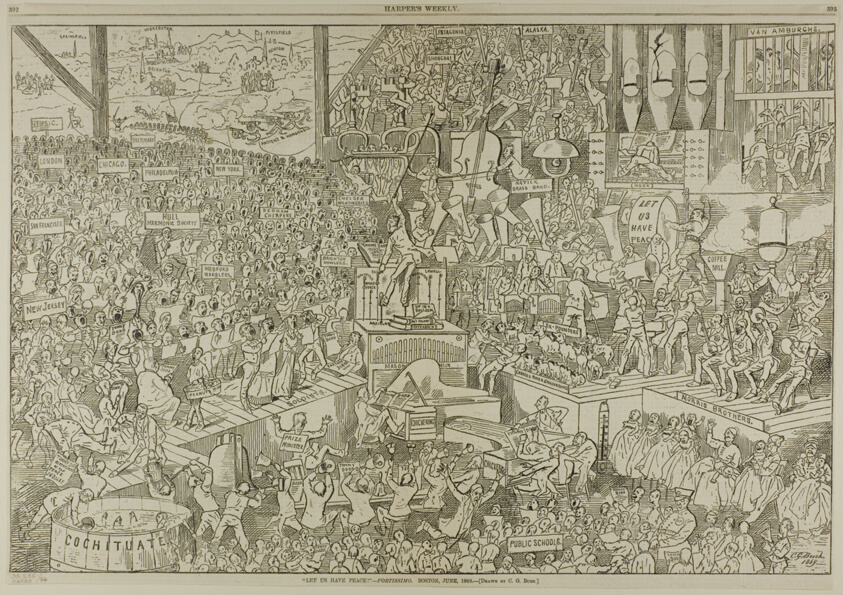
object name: Print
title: Let Us Have Peace! -Fortissimo, from Harper's Weekly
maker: Charles Green Bush (American, 1842-1909)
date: published June 19, 1869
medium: Wood engraving on newsprint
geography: United States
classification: print; prints and drawing